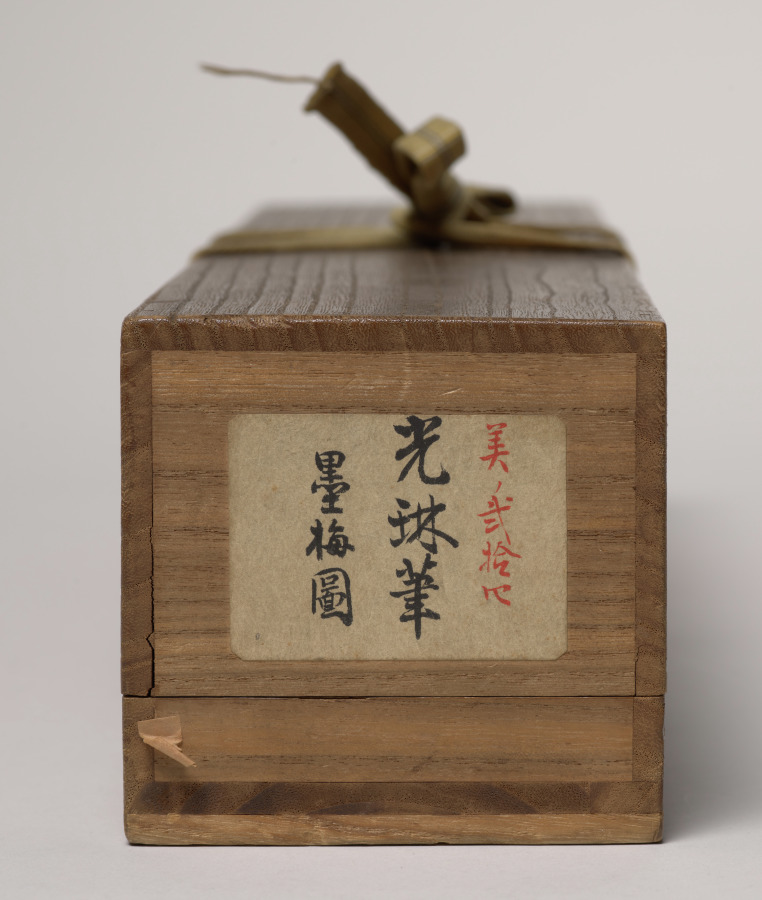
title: Plum Tree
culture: Japan, Edo period (1615–1868)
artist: Ogata Kōrin (Japanese, 1658–1716)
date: c. 1700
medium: hanging scroll; ink on silk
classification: Painting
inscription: Artist's signature and seal above hillock bottom right corner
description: Ogata Kōrin had to think through his design carefully to create these white plum blossoms and deliver their effect, as he used the reserve technique—where selected areas of the painting surface are left unpainted—to achieve it. He probably roughed in the tree before applying an ink wash to the entire silk surface, except where he intended to place the flowers. He likely then returned to articulate the petals and, in some cases, the pistils and stamens. The composition shows the tree twisting out of view, only to return with a branch of new growth jabbing forth from an old, broken limb, thereby heightening the visual impact of the blossoms.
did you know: The Rinpa style of painting is named for Ogata Kōrin, even though he did not create it.